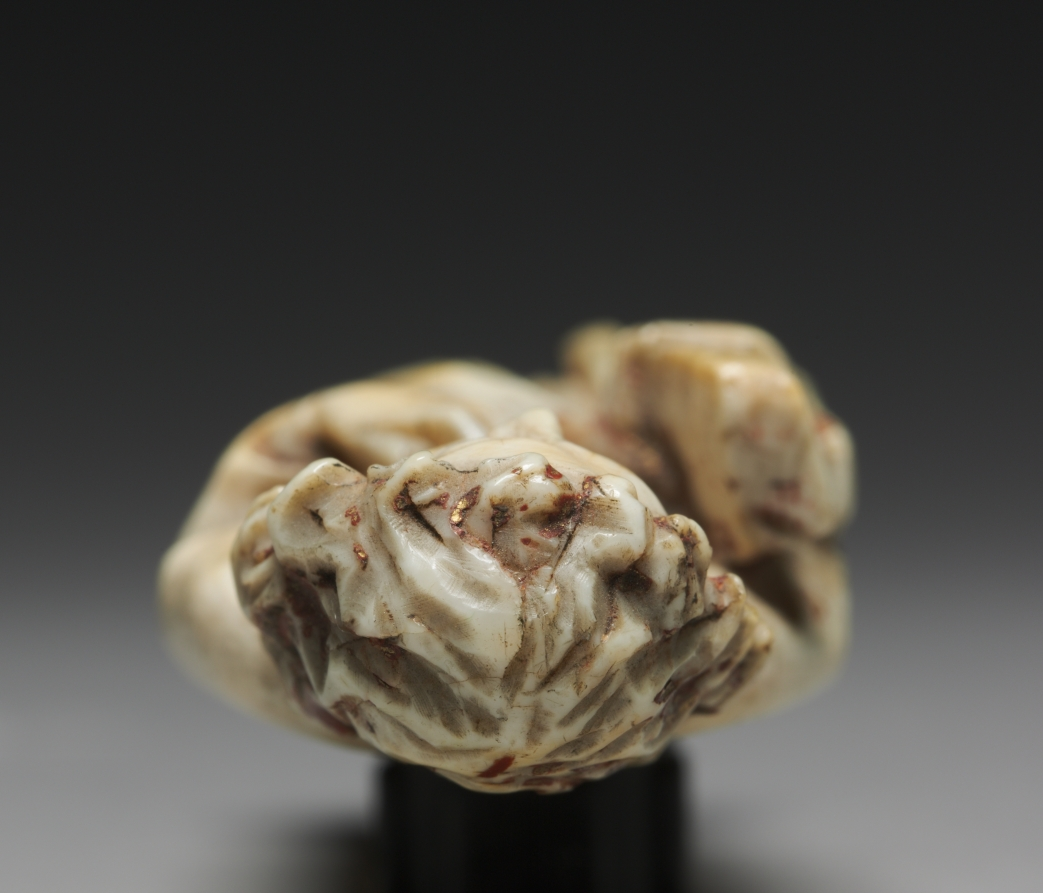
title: Saint John the Evangelist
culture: Germany or Moravia, 14th century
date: c. 1325–1330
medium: ivory with traces of paint and gilding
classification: Ivory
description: This figure with a Virgin and Crucified Christ (now lost) formed a Crucifixion group within a shrine.